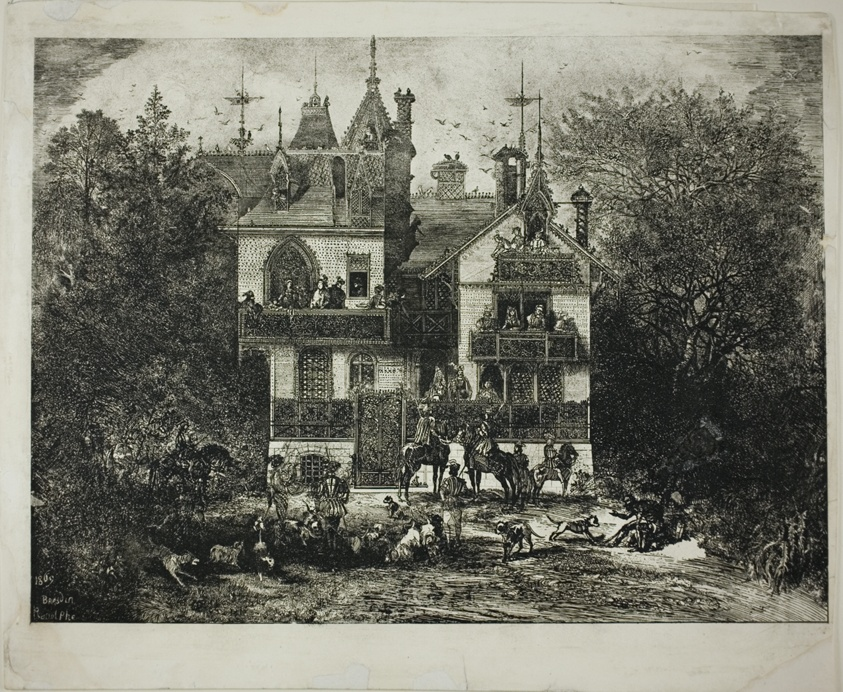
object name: Print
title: Departure for the Hunt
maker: Rodolphe Bresdin (French, 1825-1885)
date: 1869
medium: Etching on ivory wove varnished paper, laid down on gray card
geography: France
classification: etching; print; prints and drawing